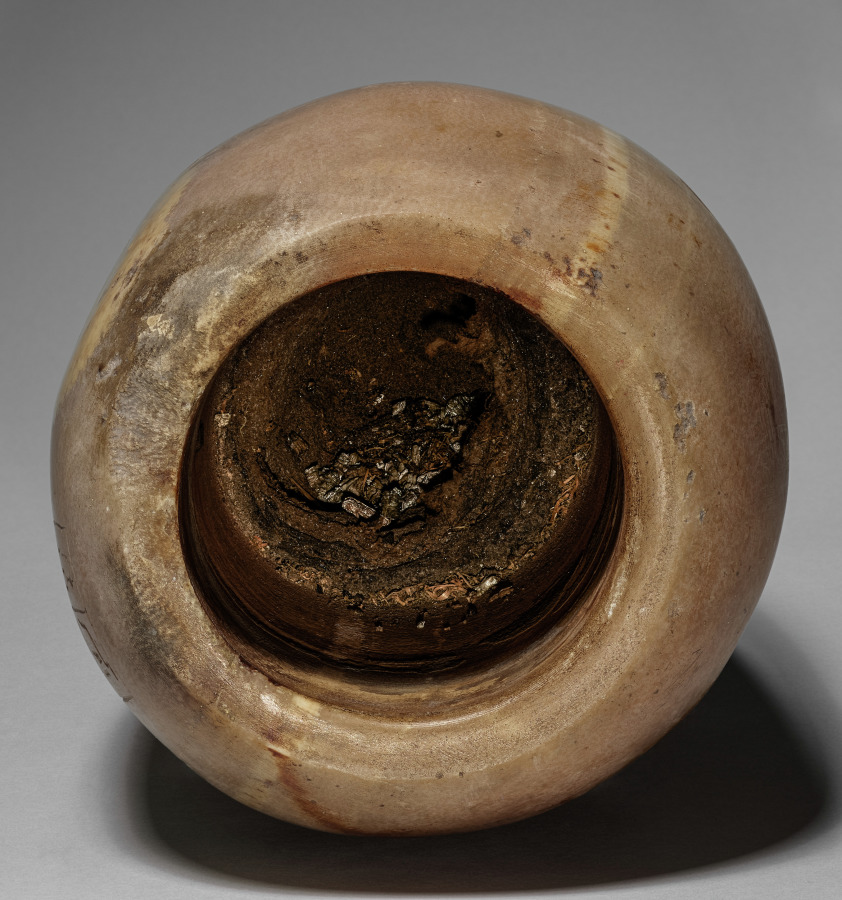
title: Canopic Jar with Falcon's Head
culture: Egypt, Late period (715–332 BCE), Dynasty 26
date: 664–525 BCE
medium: travertine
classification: Funerary Equipment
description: In the process of mummification, the liver, lungs, stomach, and intestines were removed, separately embalmed, and stored in specialized jars known as canopic jars (after a sailor in Greek mythology, who died at the town of Canopus in the Nile Delta and was worshipped there in the form of a human-headed jar). Each organ was identified with one of four funerary deities collectively known as the Sons of Horus: the liver with Imsety (man's head), the lungs with Hapy (baboon's head), the stomach with Duamutef (jackal's head), and the intestines with Qebehsenuef (falcon's head). It was their duty to protect the deceased and restore to him his body parts in the hereafter.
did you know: The falcon-headed deity Qebehsenuef protected the contents of this canopic jar. It contained the remains of the deceased's intestines, which were kept safe for the afterlife.